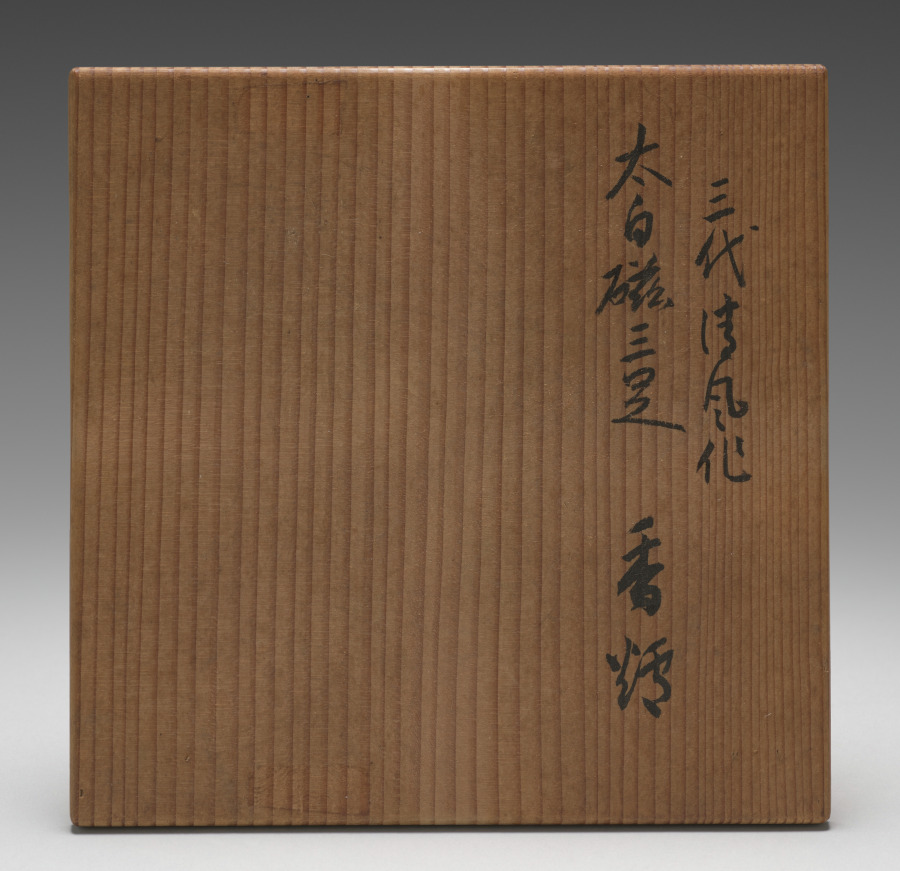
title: Incense Burner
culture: Japan, Meiji period (1868–1912)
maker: Seifū Yohei III (Japanese, 1851–1914)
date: 1893–1914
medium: Porcelain with creamy white glaze and molded design and floral openwork silver lid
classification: Ceramic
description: Yohei III made incense burners in a wide variety of designs and styles. The body and glaze of this one are taihakuji, or “great white porcelain,” an important early invention Yohei III devised in 1872. The burner has rounded, cabriole legs, resembling tiny table legs, attached to the exterior and the faintest decorative band around the bottom. Lids were produced outside the studio by metalwork specialists. For this incense burner, they created a floral-patterned silver lid.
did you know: This cylindrical incense burner has a distinctive translucent, creamy glaze over an ivory-colored clay body.